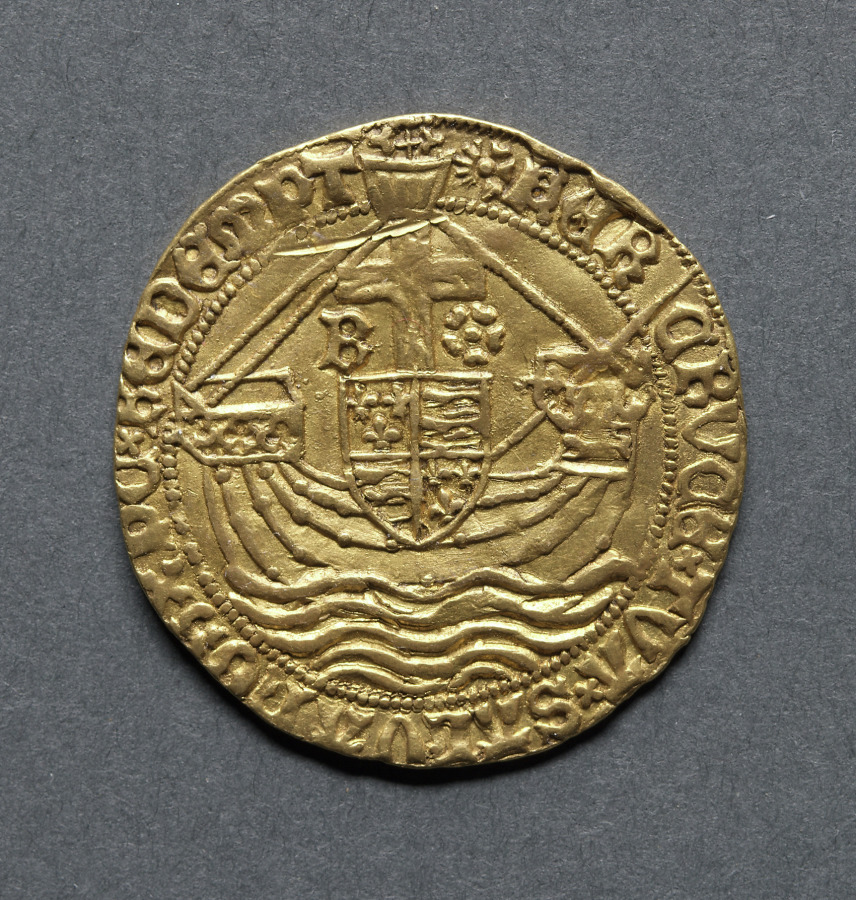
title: Angel: Ship with Shield of Arms and Cross (reverse)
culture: England, Richard III, 1483-1485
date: 1483–1485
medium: gold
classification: Coins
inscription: PER CRVCE TVA SALVA NOS XPC REDEMPT